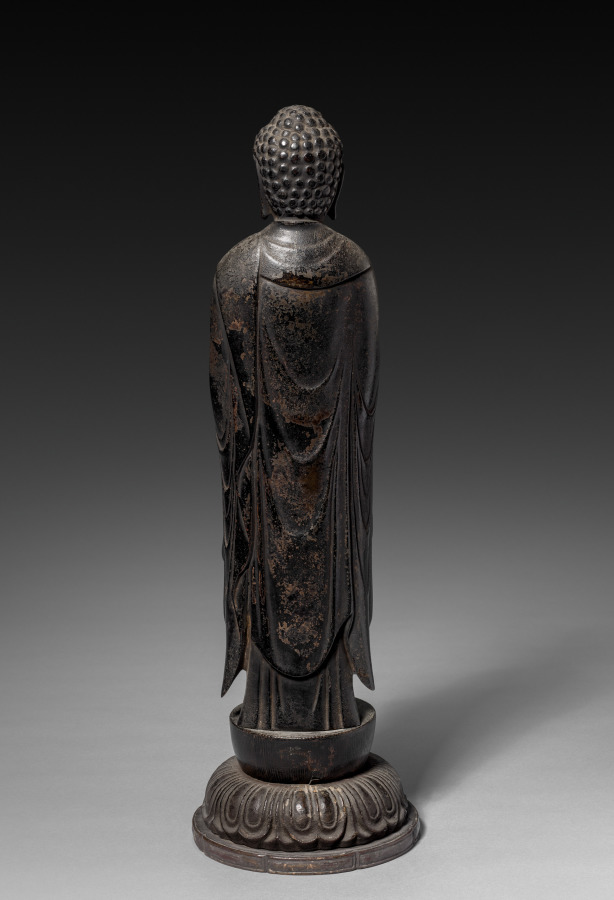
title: Amida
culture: Japan, Kamakura period (1185–1333) to Nanbokuchō period (1336–92)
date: 1300s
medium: patinated bronze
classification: Sculpture